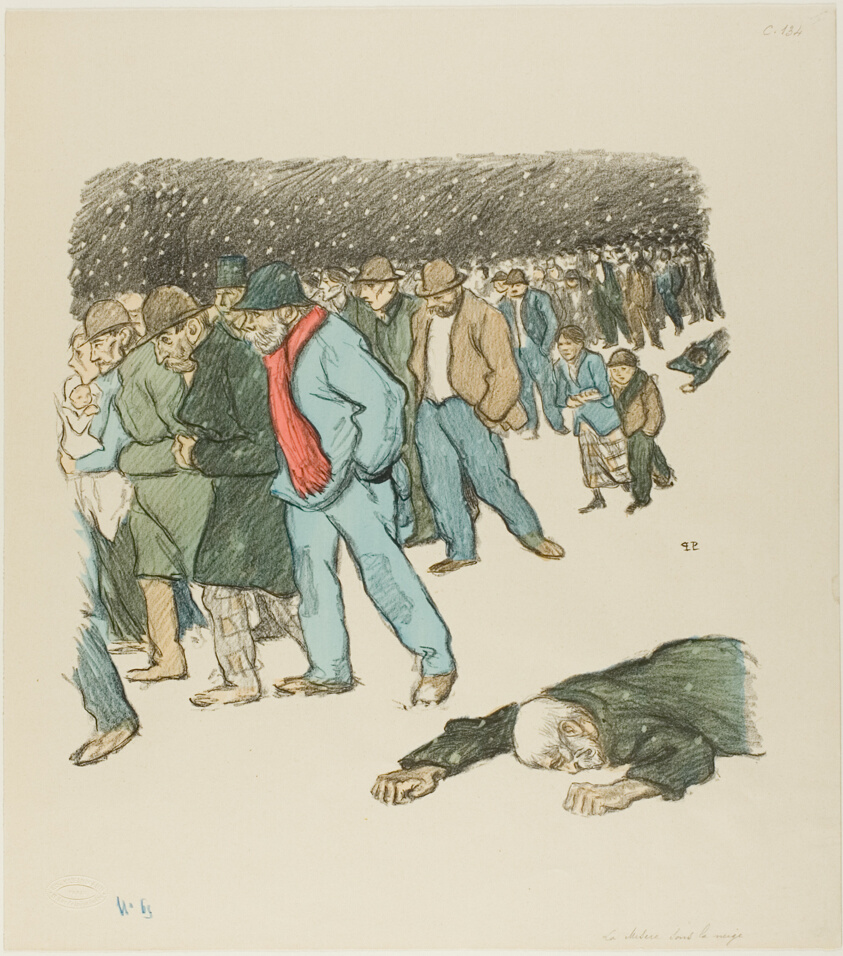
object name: Print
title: Misery Under the Snow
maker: Théophile-Alexandre Steinlen (French, born Switzerland, 1859-1923); printed by Edouard Kleinmann (French, 1844-1927)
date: January 1894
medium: Lithograph in black with stenciled colors (green, blue, red and tan) on cream wove paper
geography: France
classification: lithograph; print; prints and drawing